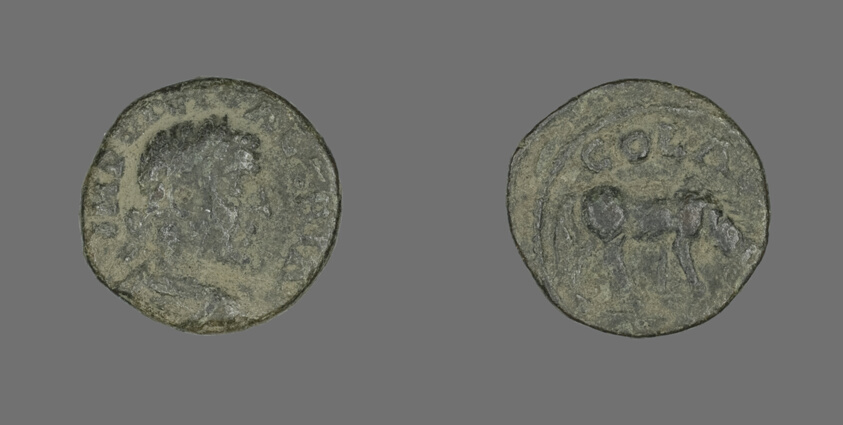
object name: Coin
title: Coin Portraying Emperor Valerian (?)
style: roman (ancient, style or period), ancient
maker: Roman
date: 253-260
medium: Bronze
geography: Roman Empire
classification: coin; ancient art